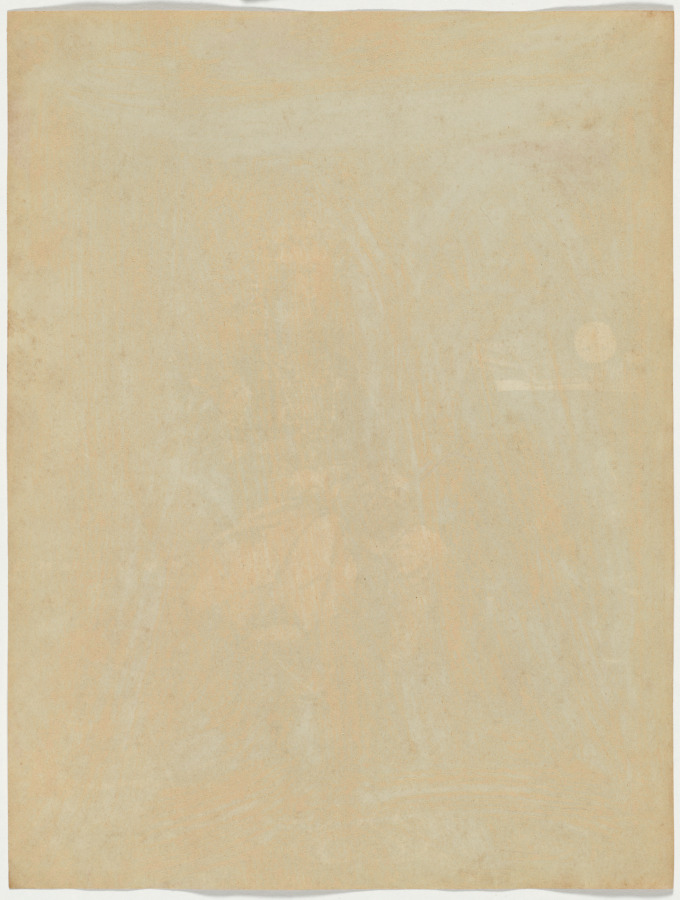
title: His Highness the Maharaja of Rewa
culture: India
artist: Raja Deen Dayal (Indian, 1844–1905)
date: 1886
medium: albumen print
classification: Photograph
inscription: No visible inscriptions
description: Deen Dayal’s status as an Indian person may have helped him gain access to Indian rulers at the start of his career. The year before he received the patronage of British officials, Deen Dayal photographed ten-year-old Venkat Raman Singh (1876–1918; reigned 1880–1918), the Maharaja of Rewa. The studio portrait reveals the boy beneath the crown. He straddles a Western-style chair that is too tall for him, curling under his stockinged feet so they touch the floor. One of his many necklaces holds a painted or photographic portrait similar to the portrait jewel pendant in the nearby case.